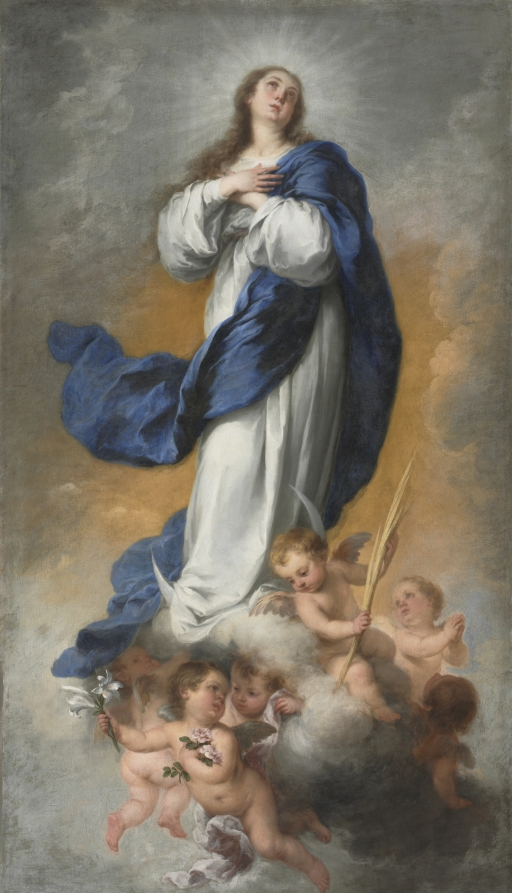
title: The Immaculate Conception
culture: Spain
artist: Bartolomé Esteban Murillo (Spanish, 1617–1682)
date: c. 1680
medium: oil on canvas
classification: Painting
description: The doctrine of the Immaculate Conception maintains that the Virgin Mary was conceived free from sin, therefore ready to be the pure vessel for Christ’s birth. The Immaculate Conception enjoyed intense devotion in Spain during the 1600s, although it was only accepted as official doctrine in 1854. The abstract subject required artists to develop appropriate imagery. The crescent moon, for example, comes from the New Testament vision of Saint John the Evangelist (Revelation 12:1) of “a woman clothed with the sun, with the moon under her feet.”